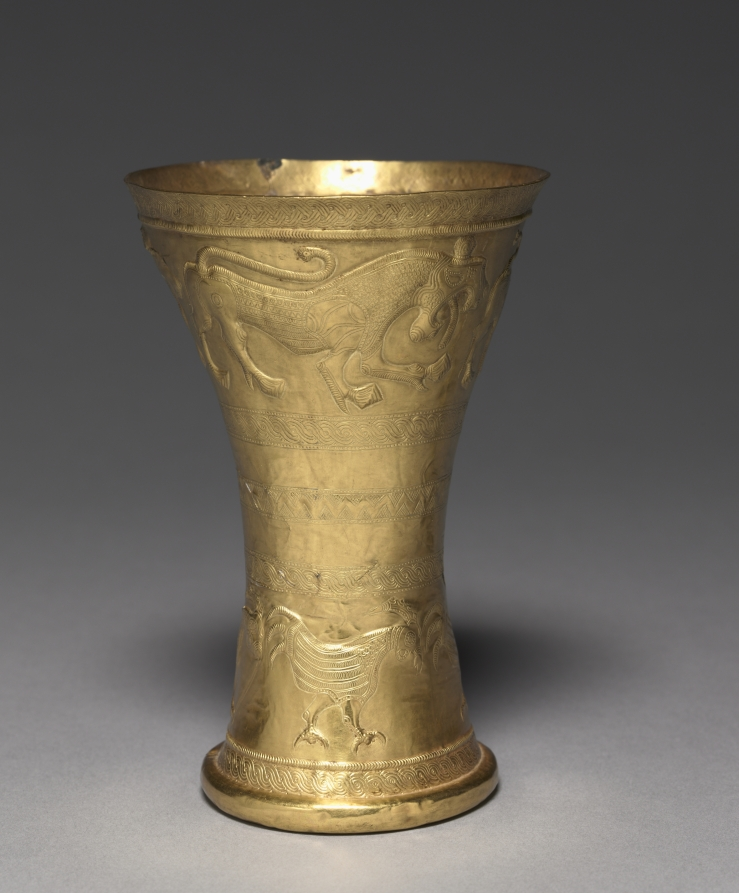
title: Beaker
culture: Iran, Marlik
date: 1100–1000 BCE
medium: gold, low relief repoussé and incised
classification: Metalwork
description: The nomadic gold- and silversmiths of Marlik and Amlash were the first masters of precious metalwork in Iran. Their successors were the bronze workers of Luristan and the silversmiths of the Achaemenian and Sasanian empires, whose masterpieces are shown elsewhere in this gallery.